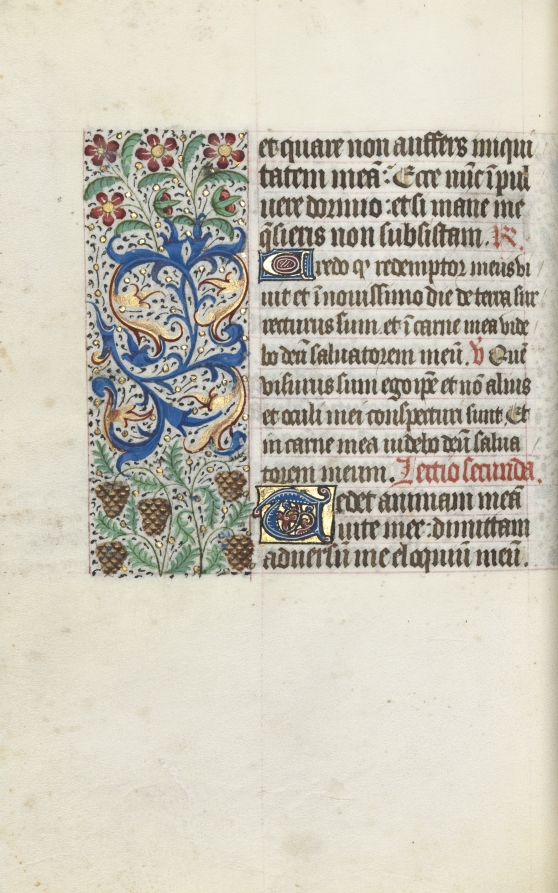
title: Book of Hours (Use of Rouen): fol. 115v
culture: France, Rouen, 15th century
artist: Master of the Geneva Latini (French, active Rouen, 1460–80)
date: c. 1470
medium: ink, tempera, and gold on vellum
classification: Bound Volume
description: In the late 1400s and early 1500s Rouen was an established and important center of book production. The city’s cathedral had a wealthy chapter that spent large sums of money to commission books and to maintain its extensive library. The stationers and booksellers would have likely been concentrated in or near the cathedral precinct. This artist, named after a manuscript now in Geneva, was Rouen’s principal illuminator during the second half of the 1400s.